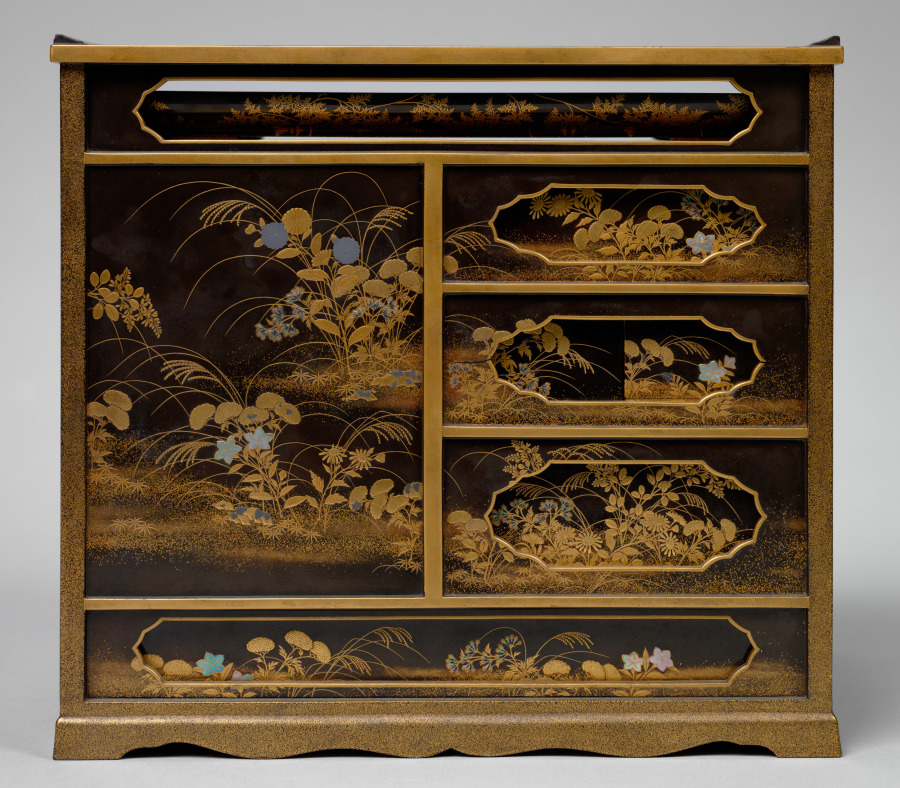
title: Ten-Round Incense Game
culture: Japan, Edo period (1615–1868)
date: 1700s–mid-1800s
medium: Lacquered wood with gold and silver sprinkled powder (maki-e) and mother-of-pearl inlay, metal fittings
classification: Lacquer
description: A popular pastime in the Edo period was a game in which a group of players passed around incense and guessed its name or scent. Small pieces of incense would be placed on thin mica plates and heated over hot ash, releasing their aroma for the players to smell. Players then cast their guesses with playing pieces. The game master kept score with the writing set. This game is handsomely decorated with images of deer in an autumn setting.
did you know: The blue and white porcelain containers in which the heated incense was passed feature designs of foreigners.